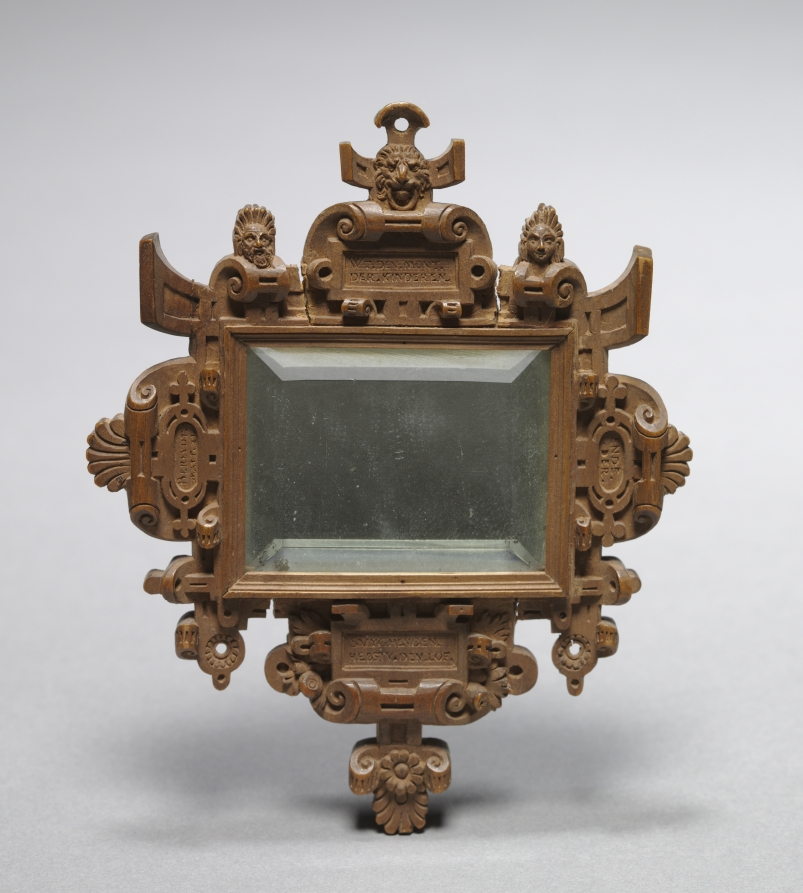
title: Mirror Frame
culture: Germany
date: mid 1500s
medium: boxwood with various inlaid stained wood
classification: Furniture and woodwork